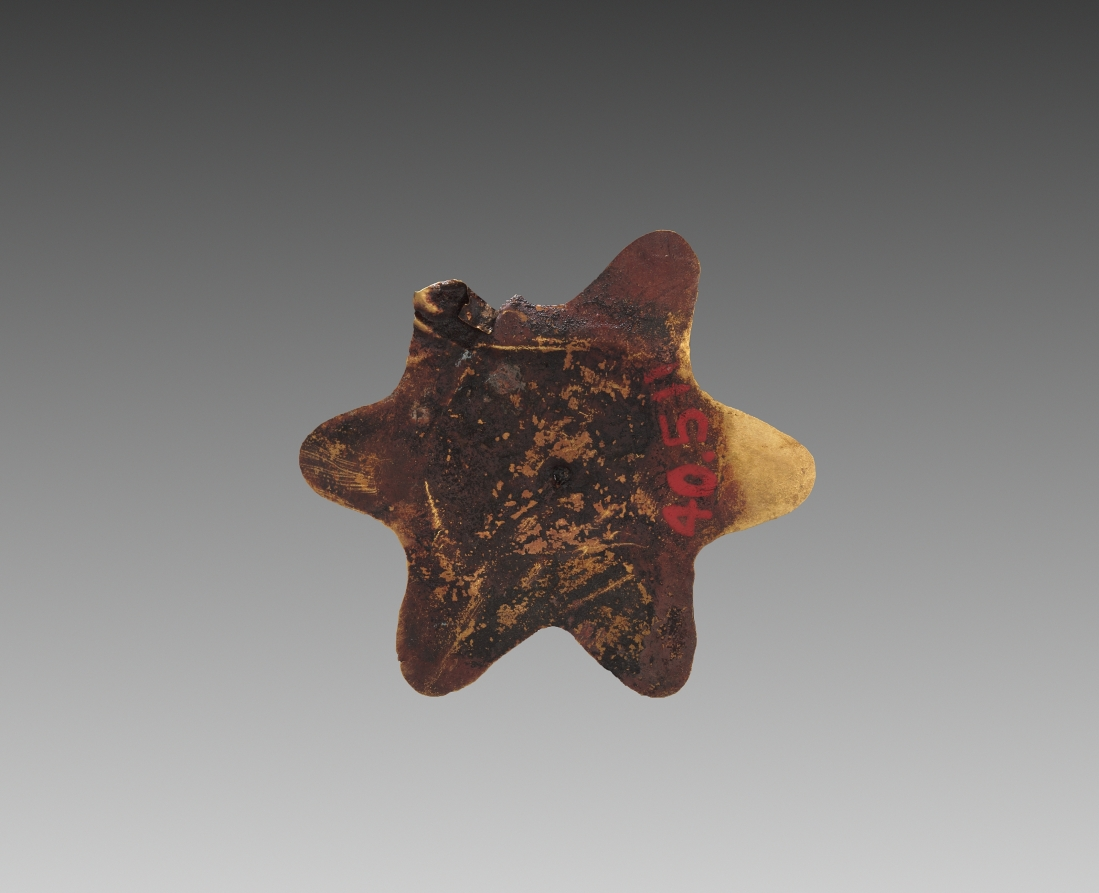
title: Headdress Ornament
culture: Peru, South Coast, Paracas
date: c. 300 BCE–200 CE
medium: hammered and embossed gold-copper alloy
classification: Jewelry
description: A similar star-shaped metal ornament is present on a human-hair wig from a mummy excavated at the Paracas Necropolis site. The wig has tresses wrapped with colored yarns, and a long headband wrapped many times around the head. The star-shaped ornament is attached to the headband, and a circular metal ornament is attached to the braid.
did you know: Tumbaga is an alloy made by blending gold with copper, which may give the gold a rosy hue.